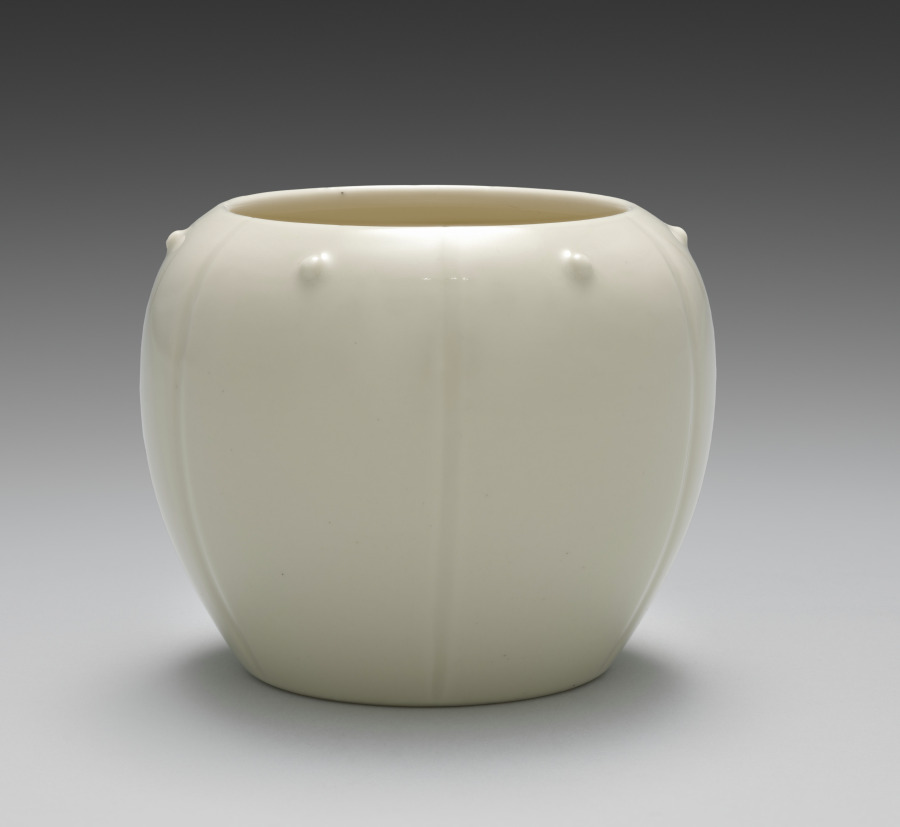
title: Container from Lit Charcoal and Ash Containers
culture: Japan, Meiji period (1868–1912)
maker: Seifū Yohei III (Japanese, 1851–1914)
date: 1893–1914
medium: One from a set of four containers; porcelain with molded design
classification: Ceramic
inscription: 清風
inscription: The storage box for this set is inscribed and impressed with seals.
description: The box lid for these six-lobed lit charcoal and ash containers, or hiire, identifies them as kōhakuji, another of Yohei III’s translucent cream colors over ivory clay bodies. One might translate the name as “lustrous pearl[–glazed ivory] porcelain.” A hiire was filled with ash with burnt coals at the center so that embers and tobacco ash could be discarded safely during a gathering. Each of the lobes on the containers has a round protrusion set below the rim. The studlike pattern is called ruiza. The term is also used to describe the pattern that rings the shoulder of some flower vases or metal kettles used in chanoyu.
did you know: The Seifu studio generally followed the standard practice in Japan for identifying the artist and object in box inscriptions.